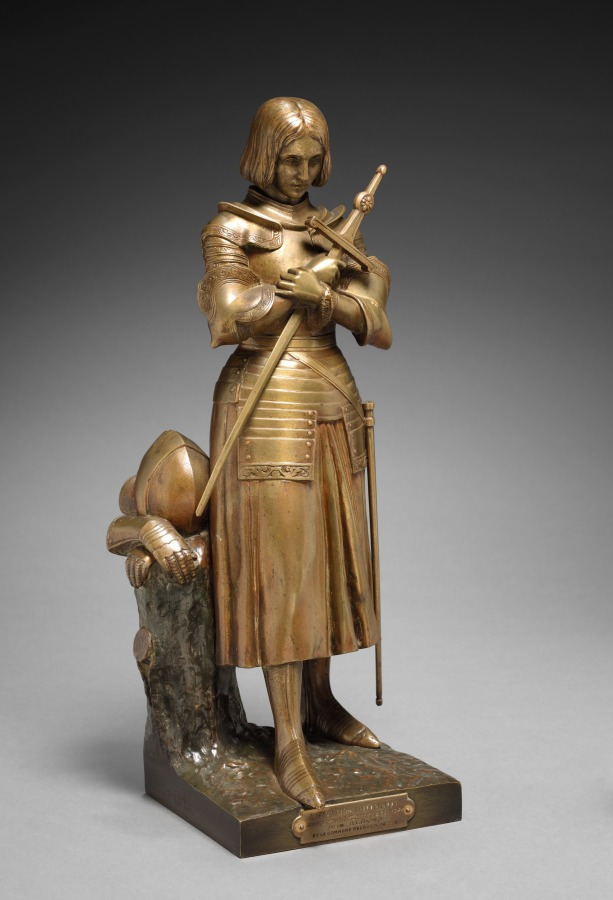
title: St. Joan of Arc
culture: France, 19th century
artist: Princesse Marie-Christine d' Orleans (French, 1813–1839)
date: 1836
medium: bronze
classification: Sculpture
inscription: Signed on top of base: "Marie d'Orléans."; inscribed on left side of base: "Susse Fres Edts Paris."